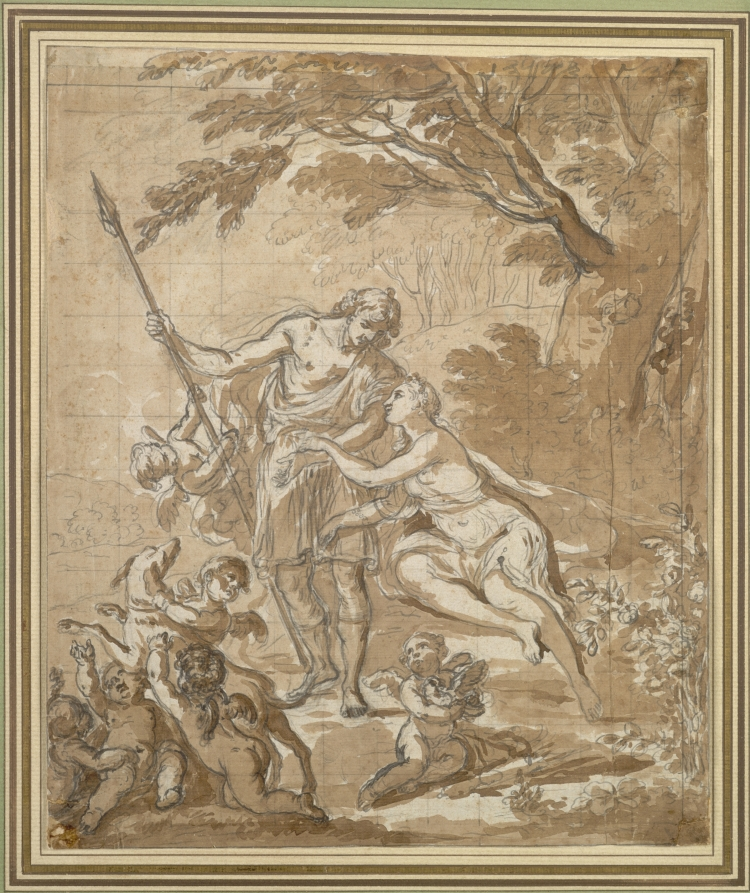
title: Venus and Adonis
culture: France, 18th century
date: 1713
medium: black chalk, pen and gray ink with brown wash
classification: Drawing